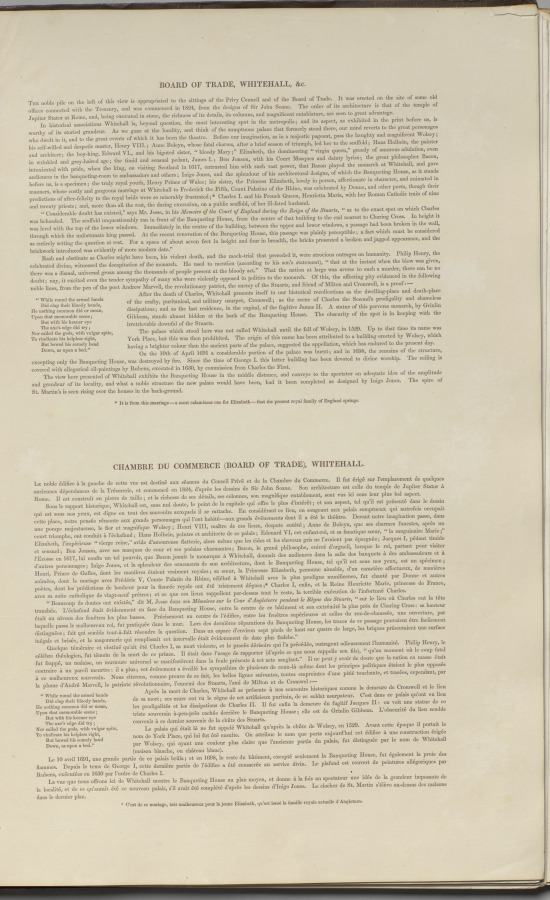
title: London As It Is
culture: England, 19th century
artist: Thomas Shotter Boys (British, 1803–1874)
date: 1842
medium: lithograph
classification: Bound Volume